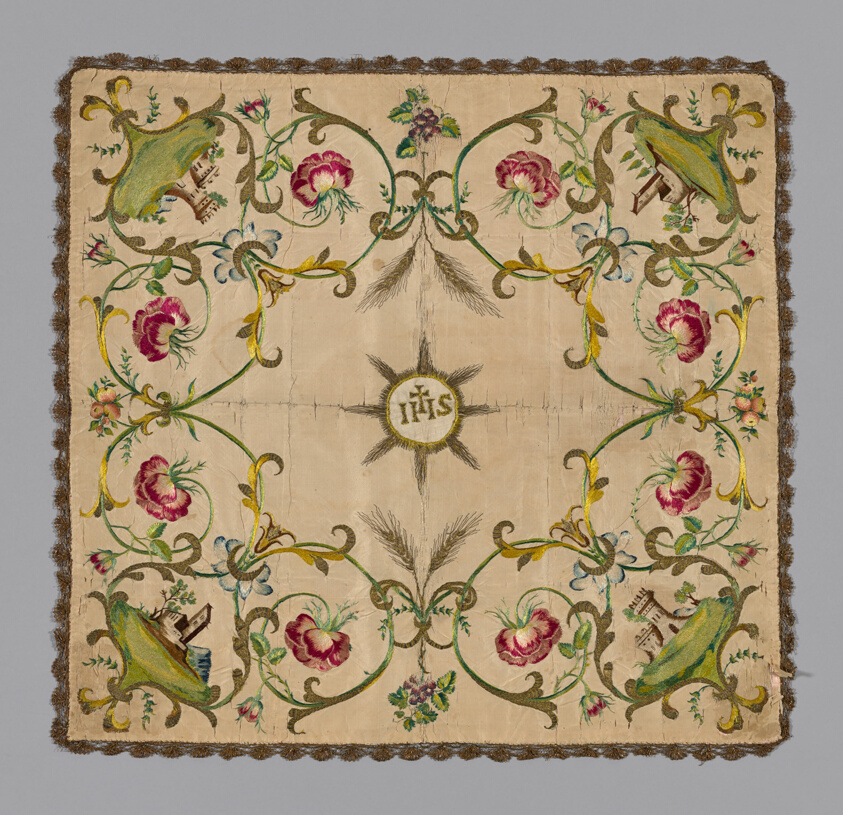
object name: Textile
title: Chalice Cover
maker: Italy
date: 18th century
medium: Silk, satin weave with needlework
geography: Italy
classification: textile; liturgical; needlework (visual works)